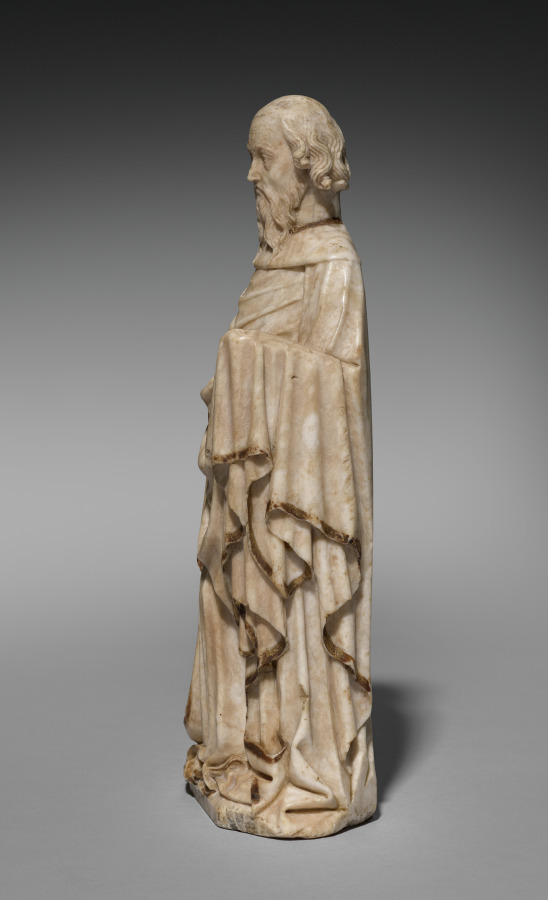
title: Standing Apostle (Saint Paul?)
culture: Southern Netherlands or Northern France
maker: Master of the Saint-Omer Apostles (Southern Netherlandish, active Bruges?)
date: c. 1430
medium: Alabaster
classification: Sculpture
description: This sculpture comes from an altarpiece in the cathedral of Saint Omer in northern France. Four other figures have been preserved there, and possibly one at the Metropolitan Museum in New York. The workshop was probably located in Bruges, in what is now Belgium. Sculpture was the leading art genre at that time. The specialized workshops obtained the stone alabaster from distant quarries, in this case from the area of Würzburg in Bavaria (Germany), to form it intricately and deliver it to customers in almost all of Europe.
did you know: Alabaster is very soft; after 20 minutes of treatment with water the surface will dissolve.